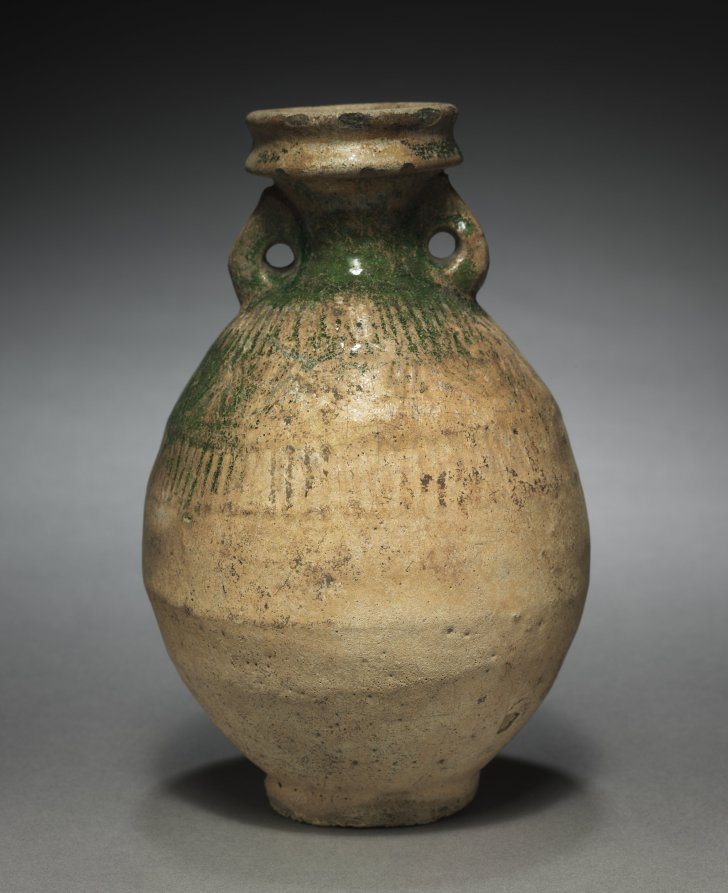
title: Ovoid Vase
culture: Parthian Empire (247 BCE–224 CE)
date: 1–200 CE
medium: terracotta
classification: Ceramic